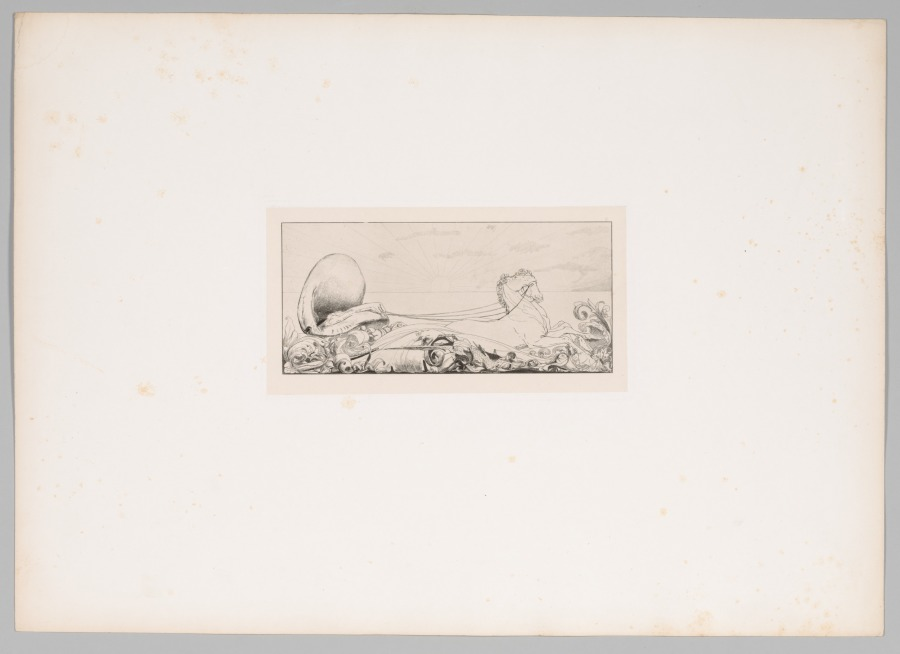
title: A Glove: Triumph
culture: Germany, 19th century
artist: Max Klinger (German, 1857–1920)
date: 1880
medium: etching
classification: Print